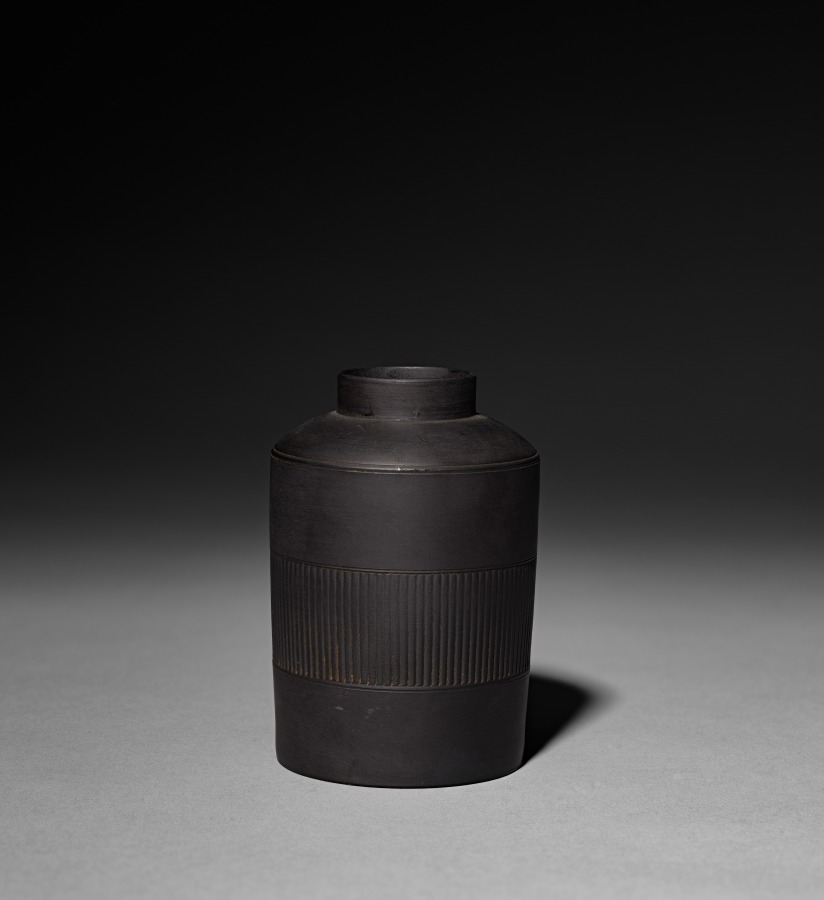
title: Tea Caddy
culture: England, Staffordshire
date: c. 1770–80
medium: Black basalt stoneware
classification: Ceramic